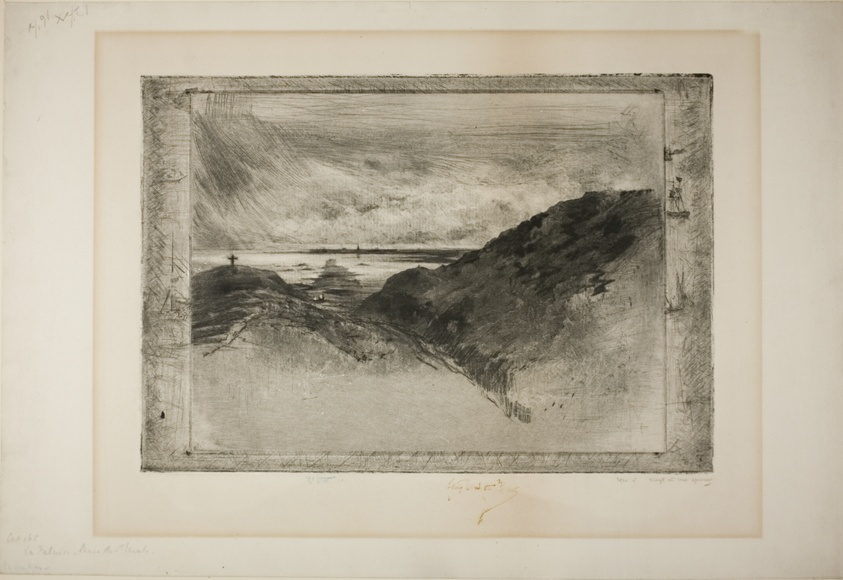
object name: Print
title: The Cliff, Bay of St. Malmo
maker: Félix Hilaire Buhot (French, 1847-1898)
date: 1889–90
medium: Etching, drypoint, and aquatint on white wove paper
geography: France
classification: etching; print; prints and drawing